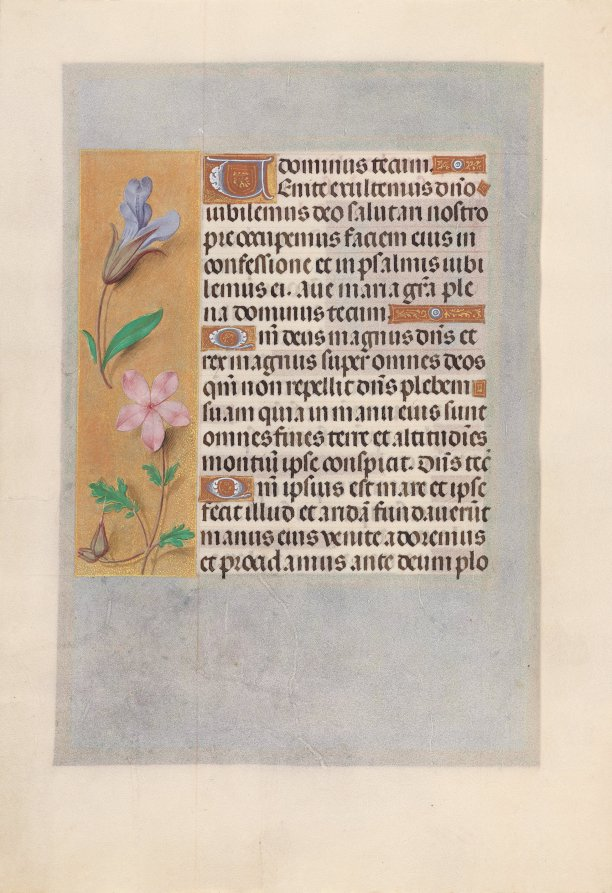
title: Hours of Queen Isabella the Catholic, Queen of Spain: Fol. 98v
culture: Flanders, Ghent and Bruges, late 15th century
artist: Master of the First Prayerbook of Maximillian (Flemish, c. 1444–1519)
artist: and Associates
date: c. 1500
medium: ink, tempera, and gold on vellum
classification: Bound Volume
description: This manuscript was illuminated by a circle of at least five highly organized manuscript painters active in the Flemish cities of Ghent and Bruges. The principal illuminator was Alexander Bening, who painted the majority of the book's miniatures. Manuscripts produced by this circle of artists are renowned for the decoration of their borders, which typically feature a rich variety of realistically-painted flowers, birds, and butterflies. This prayer book, called a book of hours, was intended not for a cleric, but for the private devotions of a lay person-in this case, Isabella the Catholic, Queen of Spain (1451-1504). Isabella's coat of arms embellishes the book's frontispiece. It is unlikely that the book was commissioned by the Queen herself; rather, she probably received it as a diplomatic gift from someone courting her patronage, perhaps Cardinal Francisco Jimenez de Cisneros. A Franciscan friar, Jimenez was dependent upon Isabella for his advancement, first to the post of Queen's confessor in 1492, and then to Archbishop of Toledo in 1495.